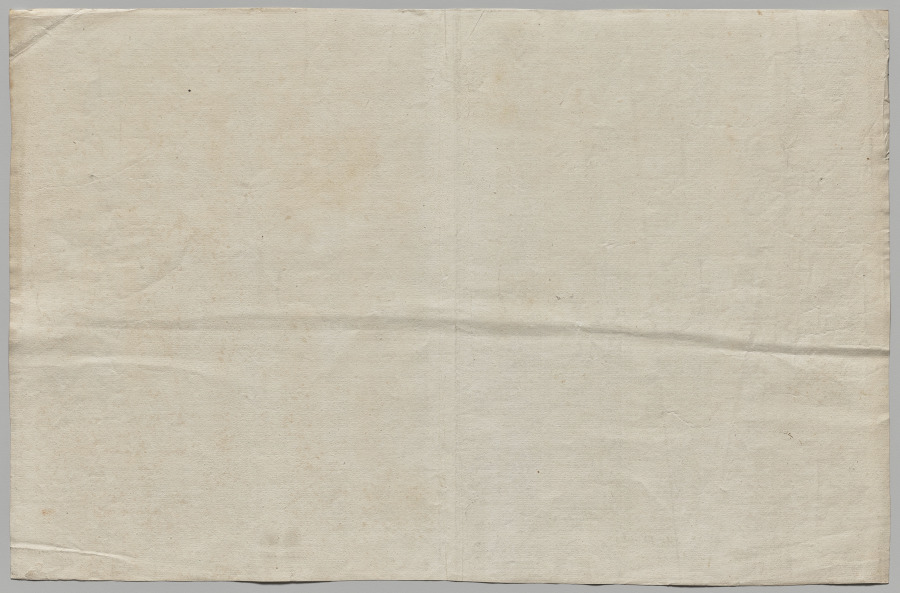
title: Nuova pianta di Roma data in luce da Giambattista Nolli l’anno MDCCXLVII, known as La Pianta Grande di Roma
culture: Italy, 18th century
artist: Giovanni Battista Nolli (Italian, 1701–1756)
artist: Carlo Nolli (Italian, 1690–1790)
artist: Rocco Pozzi (Italian, 1701–1774)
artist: Pietro Campana de Soriano (Italian, 1725–c. 1779)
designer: Stefano Pozzi (Italian, 1699–1768)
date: 1748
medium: etching and engraving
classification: Print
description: The monumental Pianta Grande di Roma, or Large Plan of Rome, which measures about 5 x 7 feet when its twelve plates are assembled, is a landmark in both cartography and printmaking. The map is considered the first scientific rendering of Rome, establishing new standards of accuracy and thoroughness when it was published in 1748. Devised by the Lombard architect and surveyor Giovanni Battista Nolli (Italian, 1701-56), the creation of the map required over ten years of surveying the city carried out by Nolli and a team of assistants with the help of new measuring devices. In Nolli’s “ichnographic” (also called “ground”) plan, architectural features and the urban infrastructure are reduced to a single horizontal slice, a minutely detailed footprint that conveys dimensions, proportions, and orientations to scale with the utmost clarity.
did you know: To make this map, Pope Clement XII granted the mapmaker permission to measure courtyards and other interior, inaccessible spaces in monastic communities, even those in nuns’ convents, which was controversial at the time.